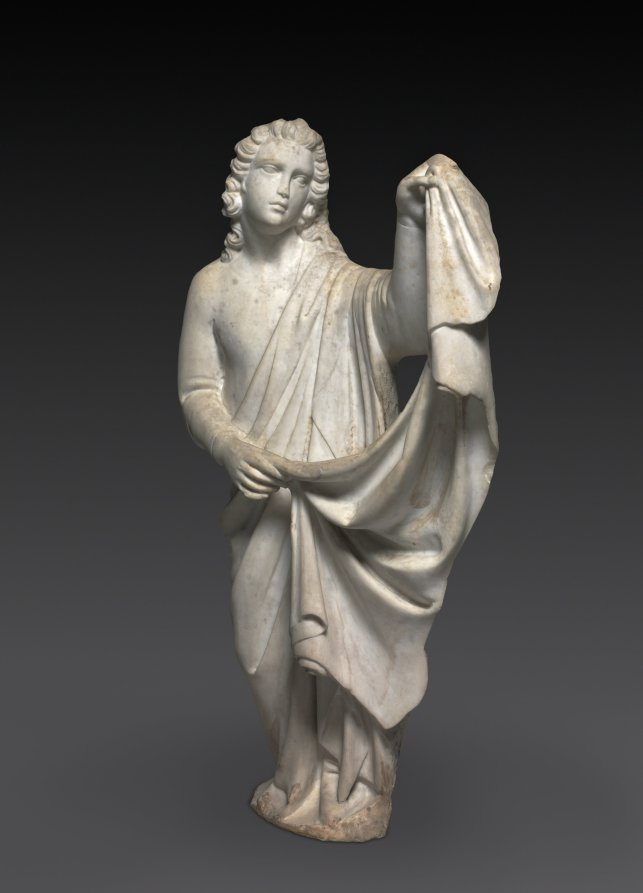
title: Angel from a Tomb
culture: Italy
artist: workshop of Tino di Camaino (Italian, c. 1285–1337)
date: 1330–50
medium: marble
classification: Sculpture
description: Tino da Camaino was active in Siena, Pisa, and Florence after 1311 where he established his reputation as an important and gifted sculptor. In 1323 he was summoned to the Angevin court at Naples, probably by King Robert of Anjou to work on the sepulchral monument of the king's daughter-in-law, Catherine of Austria. During the remainder of his life, Tino created a remarkable series of tomb sculptures in Naples. This pair of marble angels most likely represents the work of a member of Tino's workshop produced for one of these Neapolitan tombs, either during the final years of the master's life, or else independently after Tino's death in 1337.